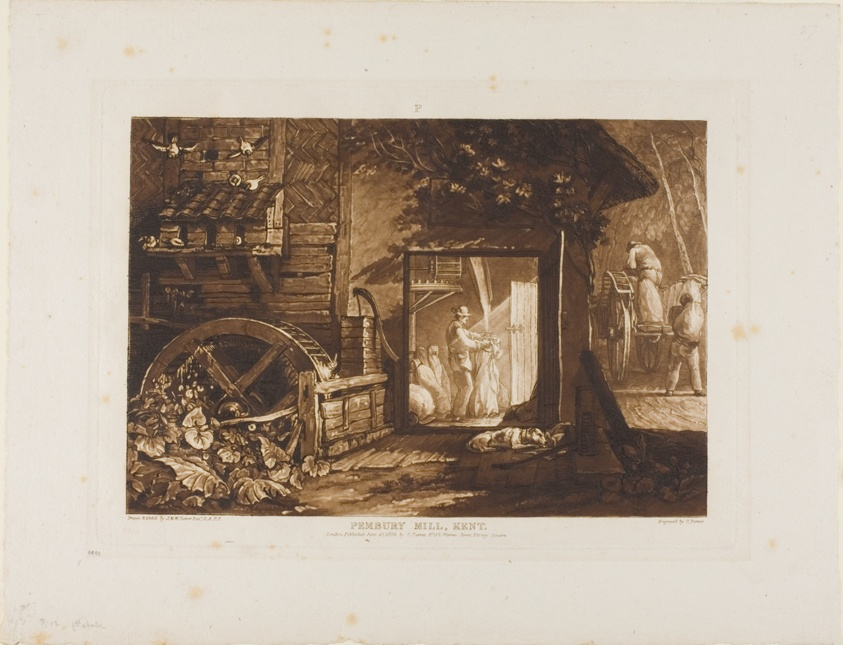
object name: Print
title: Pembury Mill, Kent, plate 12 from Liber Studiorum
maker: Joseph Mallord William Turner (English, 1775-1851); Engraved by Charles Turner (English, 1773-1857)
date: published June 10, 1808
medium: Etching and engraving in brown on off-white paper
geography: England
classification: etching; print; prints and drawing